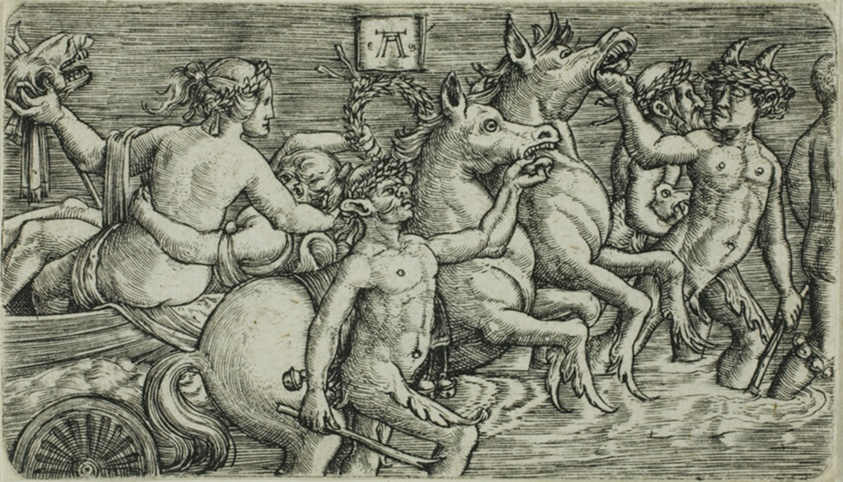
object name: Print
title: The Triumph of the Sea-Gods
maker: Albrecht Altdorfer (German, c. 1480-1538); after Peregrino da Casena (Italian, active c. 1490-1520)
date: 1520/25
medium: Engraving in black on ivory laid paper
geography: Germany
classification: engraving; print; prints and drawing